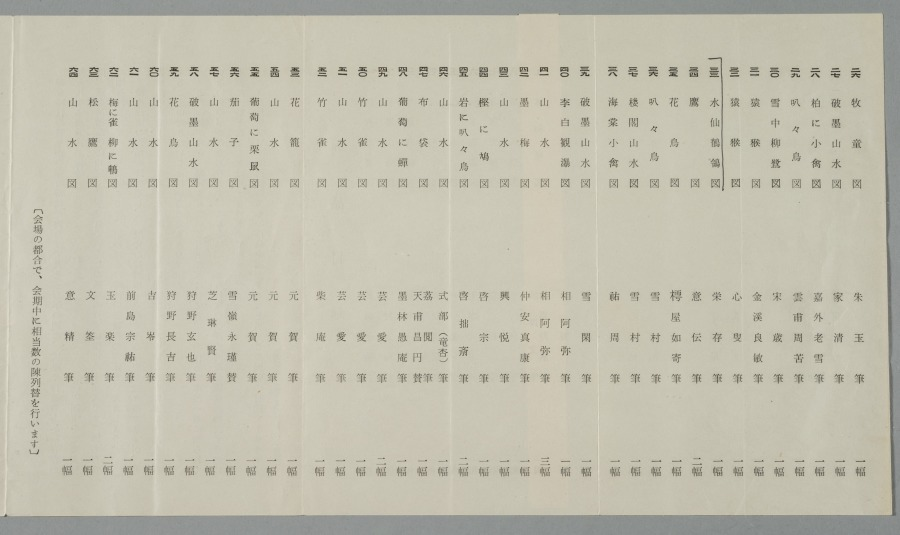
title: Wagtails and Narcissus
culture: Japan, Muromachi period (1392–1573)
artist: Eison (Japanese)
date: mid-1500s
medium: hanging scroll; ink on paper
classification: Painting